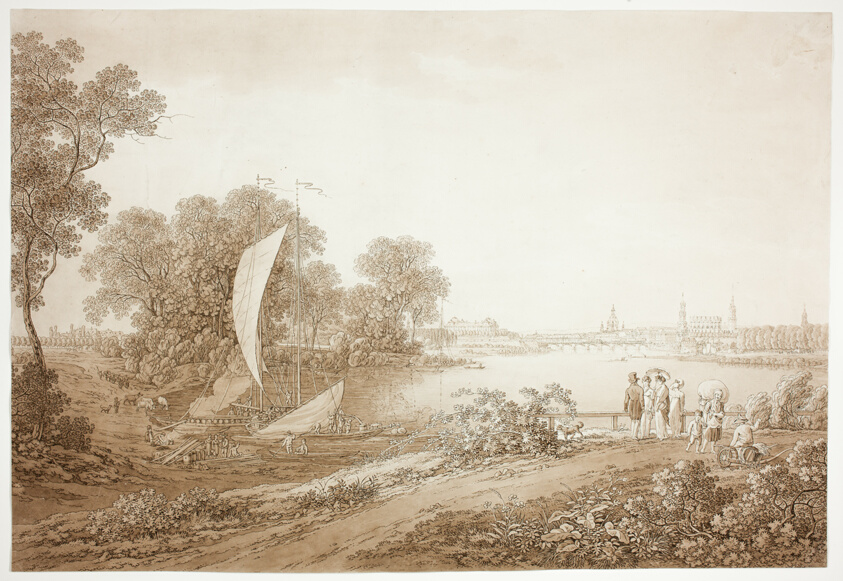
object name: Drawing and Watercolor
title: View of Dresden from Pieschen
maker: Adrian Zingg (Swiss, 1734-1816)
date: c. 1805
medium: Brush and various brown washes, over etching, on ivory wove paper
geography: Switzerland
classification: pen and ink drawings; drawings (visual works); prints and drawing